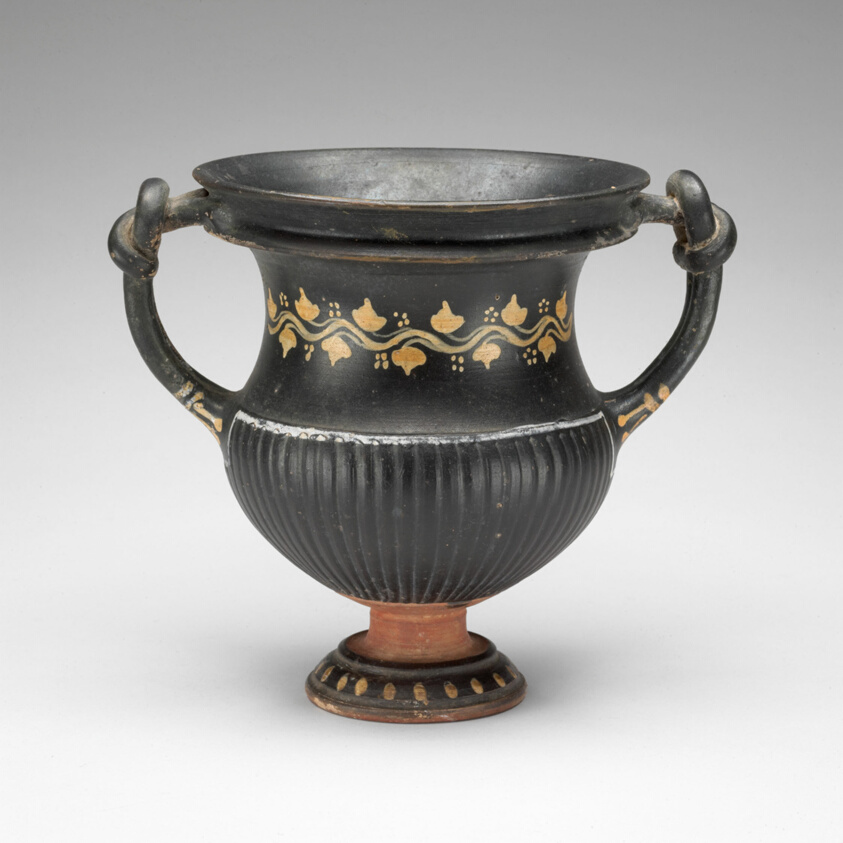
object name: Vessel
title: Kantharos (Wine Cup)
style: gnathian, apulian, south italian, ancient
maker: Greek; Apulia, Italy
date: 300-275 BCE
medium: terracotta, Late Gnathia ware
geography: Apulia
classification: drinking vessel; vessel; ancient art; container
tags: dining, drinking